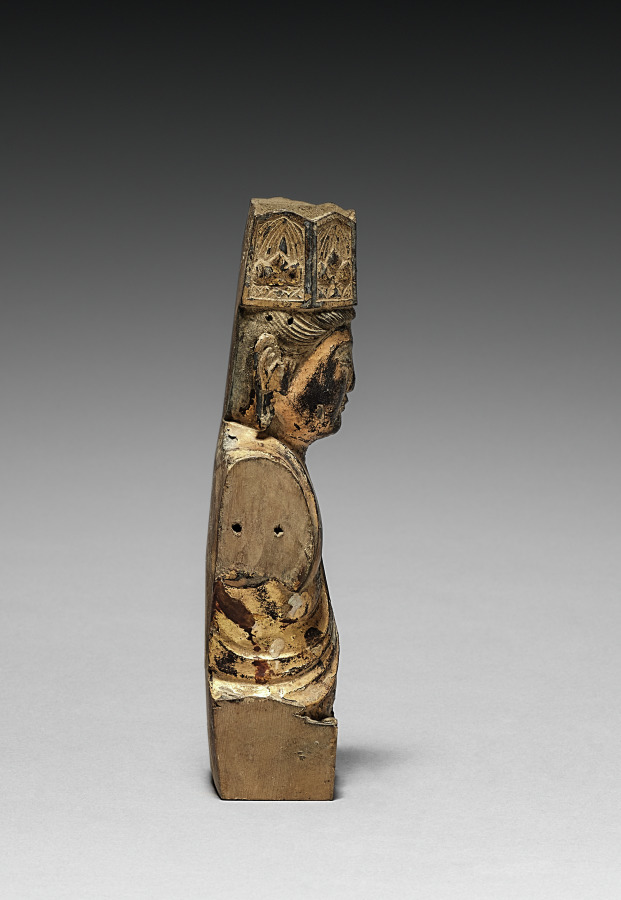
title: Bodhisattva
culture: Japan, Heian period (794–1185)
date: 900s-1100s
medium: gilded wood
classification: Sculpture